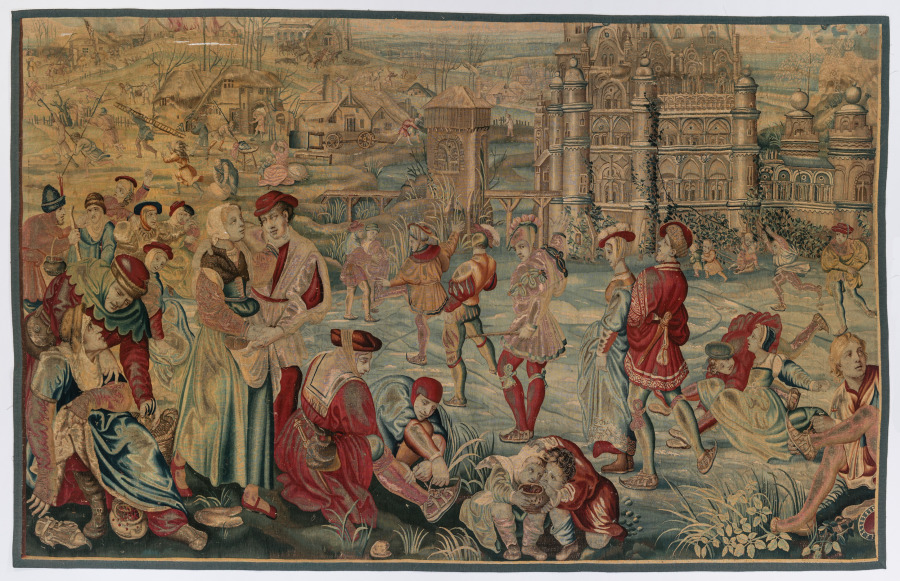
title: Winter: Skating Scene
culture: France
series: Four Seasons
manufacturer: possibly by Gobelins Manufactory (France, Paris, est. 1662)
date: designed c. 1535, woven mid- to late 1600s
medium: Wool, silk, and gold filé: tapestry weave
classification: Tapestry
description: People of all classes and ages enjoyed ice skating, a winter pastime popularized in the Netherlands. Here, some couples are already skating and slipping on the ice, while others tie on their skates or huddle around braziers (portable coal heaters) to keep warm. One affectionate couple in the foreground hold hands as they walk. A castle on the far edge of the frozen lake occupies the background. In the left distance, several small figures holding ladders and long hooks run toward a building that has caught on fire, a frequent occurrence in the winter when wooden houses were heated by fireplaces.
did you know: If you look closely you can see that the top edge of this scene is missing; look at the top of the castle on the right or the forest fire on the left.